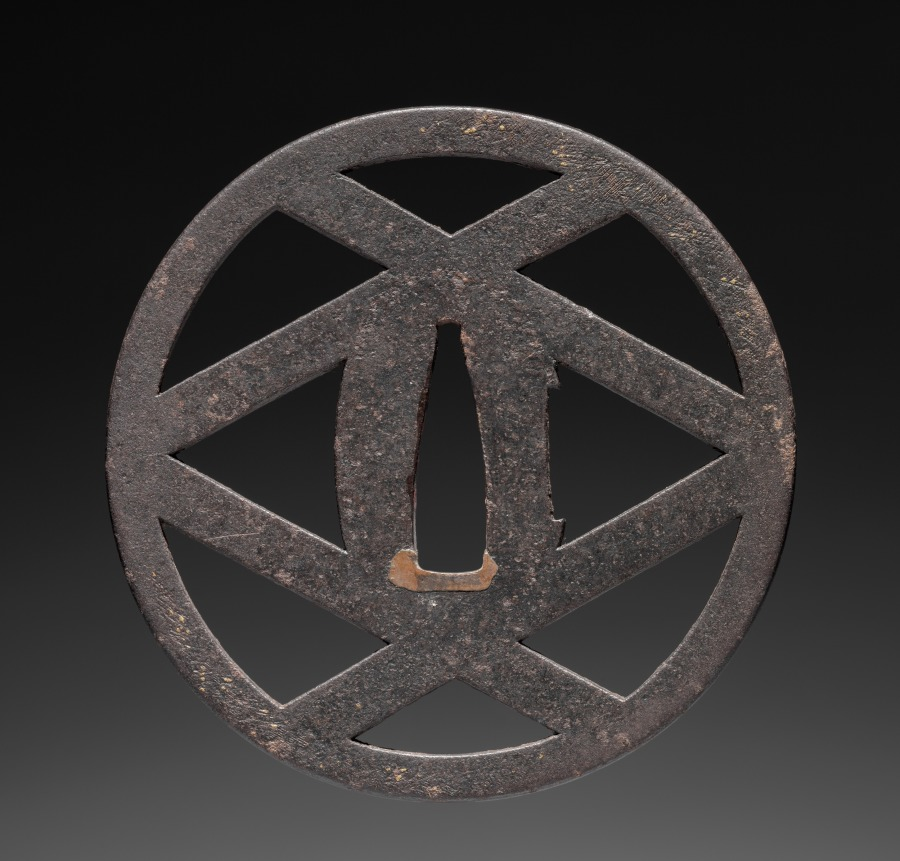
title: Sword Guard (Tsuba)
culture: Japan, possibly Edo period (1615-1868)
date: c. 1615–1868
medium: iron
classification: Arms and Armor